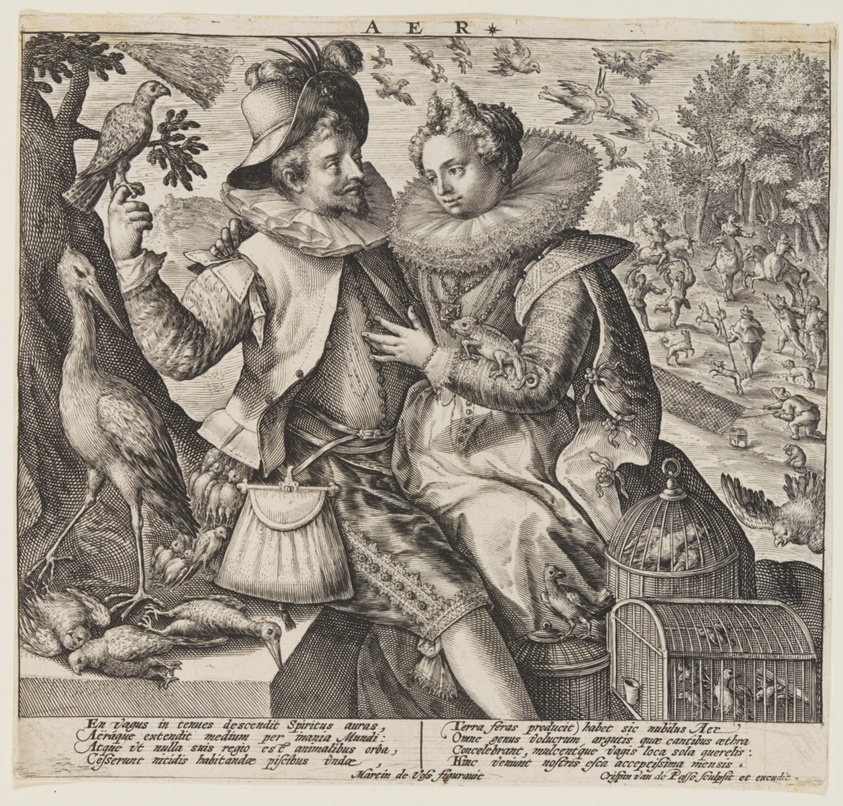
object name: Print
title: Aer (Air), from The Elements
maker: Crispijn van de Passe I (Dutch, c. 1565–1637); after Maerten de Vos Maarten de Vos (Flemish, 1532–1603)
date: c. 1600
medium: Engraving on ivory laid paper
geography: Netherlands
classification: engraving; paper; print; prints and drawing